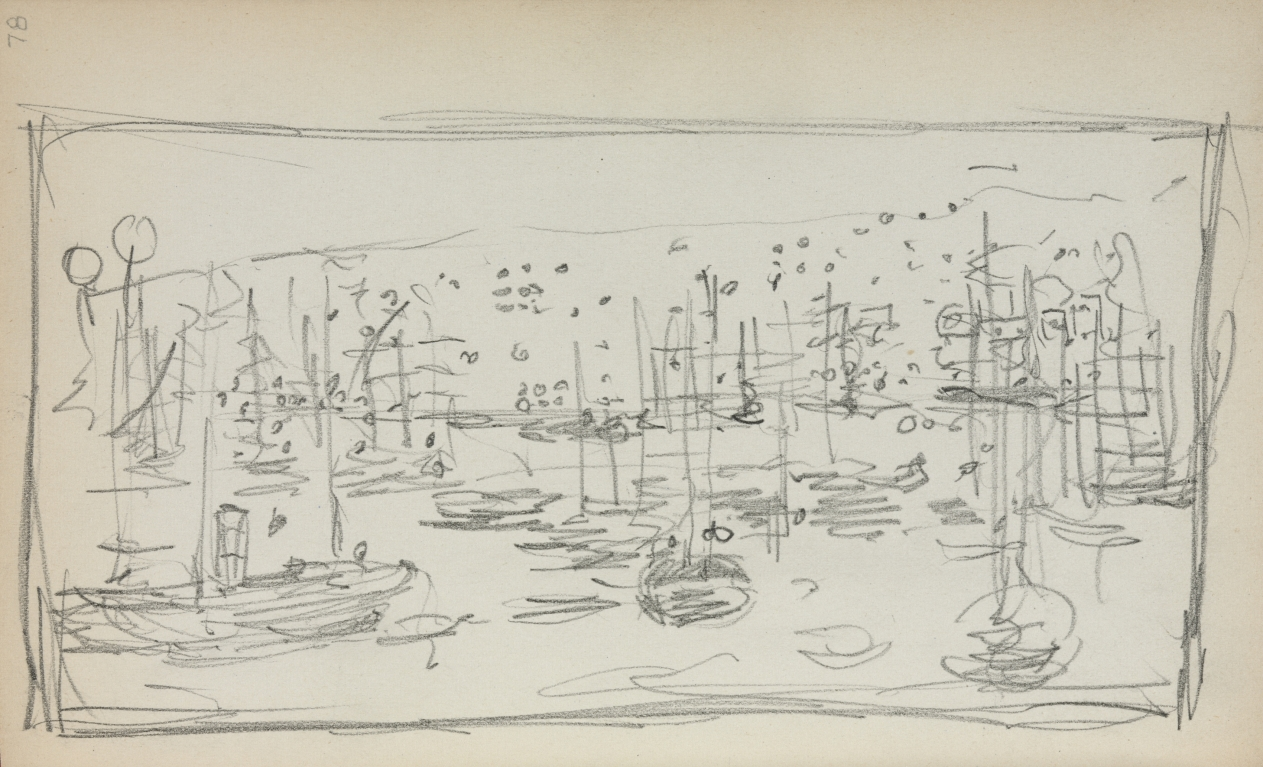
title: Italian Sketchbook: Harbor (page 78)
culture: America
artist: Maurice Prendergast (American, born Newfoundland [now Canada], 1858–1924)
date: 1898–1899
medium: pencil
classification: Bound Volume